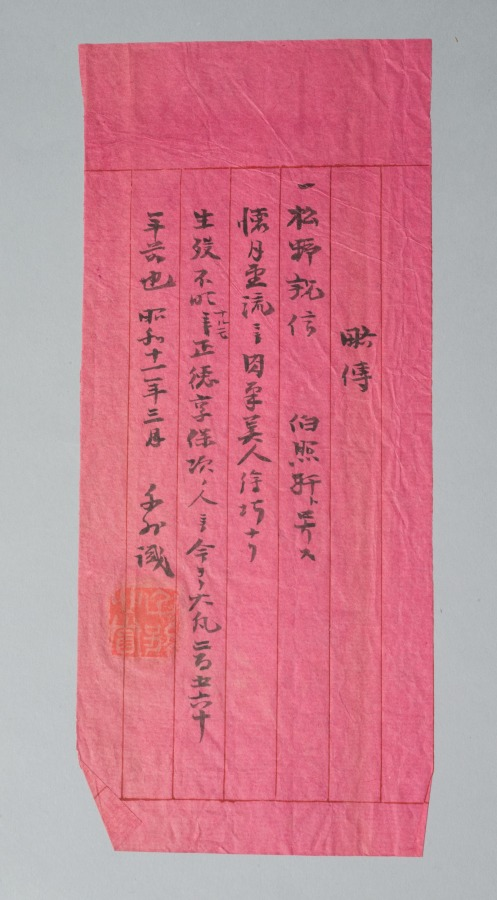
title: Courtesan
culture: Japan, Edo period (1615–1868)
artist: Matsuno Chikanobu (Japanese, active 1716–35)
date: 1716–35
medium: hanging scroll; ink and color on paper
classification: Painting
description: A glamorous courtesan sports an outer robe decorated with large roundels featuring plant motifs including iris and bush clover. Little is known about the life and artistic training of the painter Matsuno Chikanobu, an ukiyo-e artist who painted in a style strongly reminiscent of that of the Kaigetsudō studio. Many of his known paintings are on silk, and executed with high quality pigments, indicating that his primary clientele were wealthy individuals.